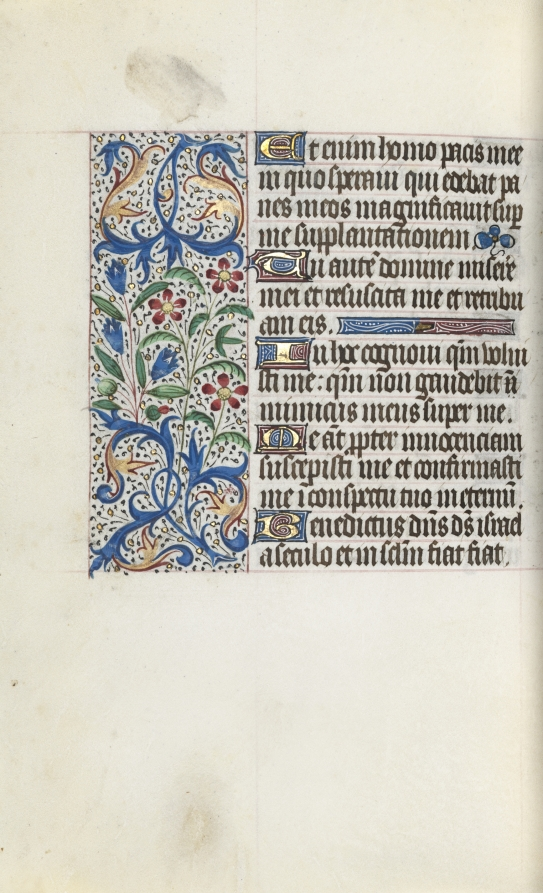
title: Book of Hours (Use of Rouen): fol. 128v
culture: France, Rouen, 15th century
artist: Master of the Geneva Latini (French, active Rouen, 1460–80)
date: c. 1470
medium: ink, tempera, and gold on vellum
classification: Bound Volume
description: In the late 1400s and early 1500s Rouen was an established and important center of book production. The city’s cathedral had a wealthy chapter that spent large sums of money to commission books and to maintain its extensive library. The stationers and booksellers would have likely been concentrated in or near the cathedral precinct. This artist, named after a manuscript now in Geneva, was Rouen’s principal illuminator during the second half of the 1400s.